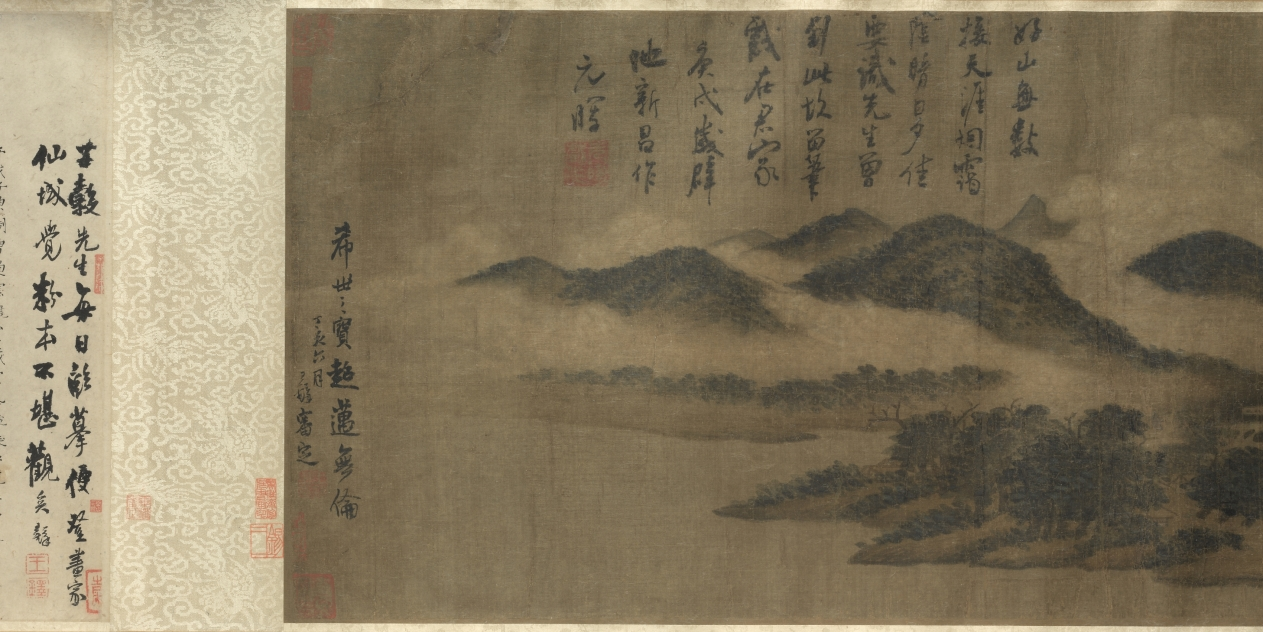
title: Cloudy Mountains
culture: China, Southern Song dynasty (1127-1279)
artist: Mi Youren (Chinese, 1072–1151)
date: 1130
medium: Handscroll; ink and color on silk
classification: Painting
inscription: 好山無數接天涯，烟靄陰晴日夕佳。/ 要識先生會到此，故留筆戲在君家。/ 庚戍歲，辟地新昌作。元暉。/ [seal] 元暉戲作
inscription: [Seal] 安陽孫氏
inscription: [Seal] 畢瀧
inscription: [Seal] 成親王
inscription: [Seal] 永瑆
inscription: [Seal] 錫三 appears twice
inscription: [Seal] 養性齋珍藏書畫印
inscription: [Seal] 芷陔審定真跡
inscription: [Seal] 玉簡齋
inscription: 2 colophons (1 dated 1650), inscription dated 1647, and 2 seals of Wang To (1592–1652)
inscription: 1 colophon, dated second month of the gengyin year 庚寅 (1650), and 2 seals of Chen Kuang 陳爌 (1646 jinshi degree)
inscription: 7 seals unidentified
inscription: A separate scroll containing six colophons on Cloudy Mountains exists; the inscribers are Luo Zhenyu 羅振玉 (1866–1940), Naito Torajiro 內藤虎次郎 (1866–1934), Nagao Ko 長尾甲 (1864–1942), and Wu Changshuo 吳昌碩 (1844–1927). Naito Torajiro alone wrote three colophons.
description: Cloudy Mountains captures the view of a lush and misty riverscape, an impression of Mi Youren’s new environment, painted in a moment of peace. With the fall of the Northern Song dynasty in 1127 upon the Jurchen’s military invasion, Mi Youren fled south across the Yangzi River. In 1130, he had reached Xinchang in Zhejiang province and thanked his host with this painting for having given him shelter. Mi Youren was the oldest son of the art critic Mi Fu (1051– 1107); both developed a distinct style of mountain scenery by accumulating wet ink dots that create a hazy atmosphere.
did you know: This scroll is one of the museum’s earliest dated Chinese paintings.